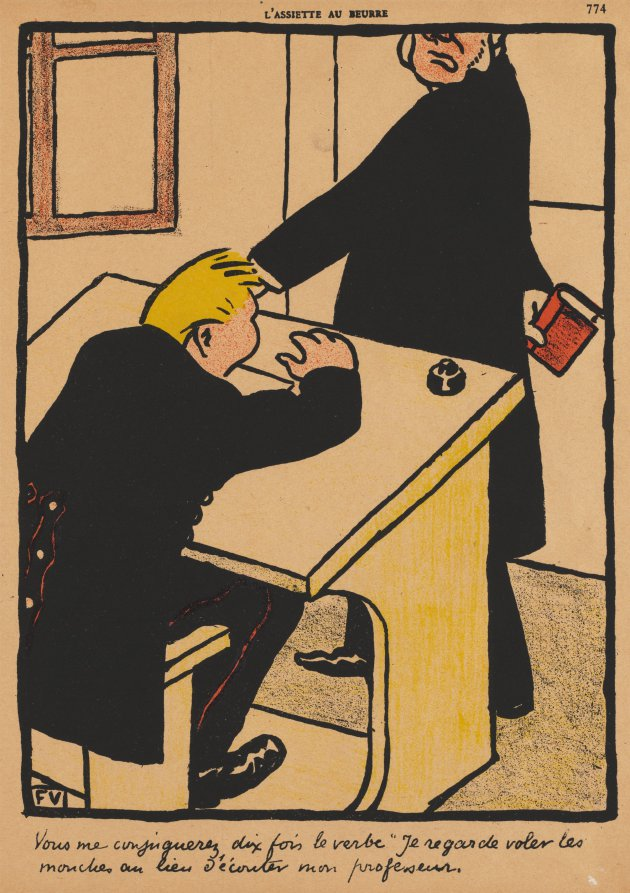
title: You shall conjugate...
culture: France, 19th century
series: Crimes and Punishments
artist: Félix Vallotton (Swiss French, 1865–1925)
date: 1901, published 1902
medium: color lithograph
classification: Print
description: This print was published in the magazine L’Assiette au Beurre (March 1, 1902 ) as plate 17 from the series Crimes and Punishments.